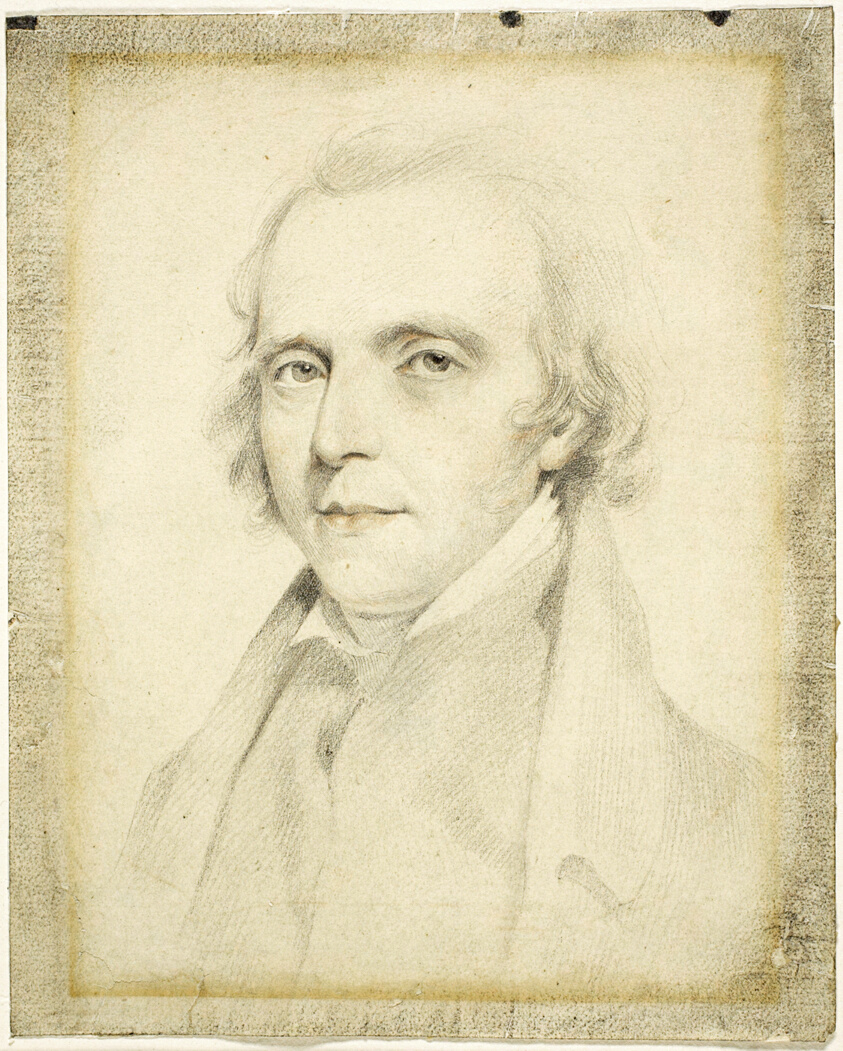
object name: Drawing and Watercolor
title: Portrait of John Flaxman, R.A.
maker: probably George Henry Harlow (English, 1787-1819); possibly Sir Thomas Lawrence (English, 1769-1830)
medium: Graphite, with red pencil, on cream wove paper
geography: England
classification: graphite; drawings (visual works); prints and drawing